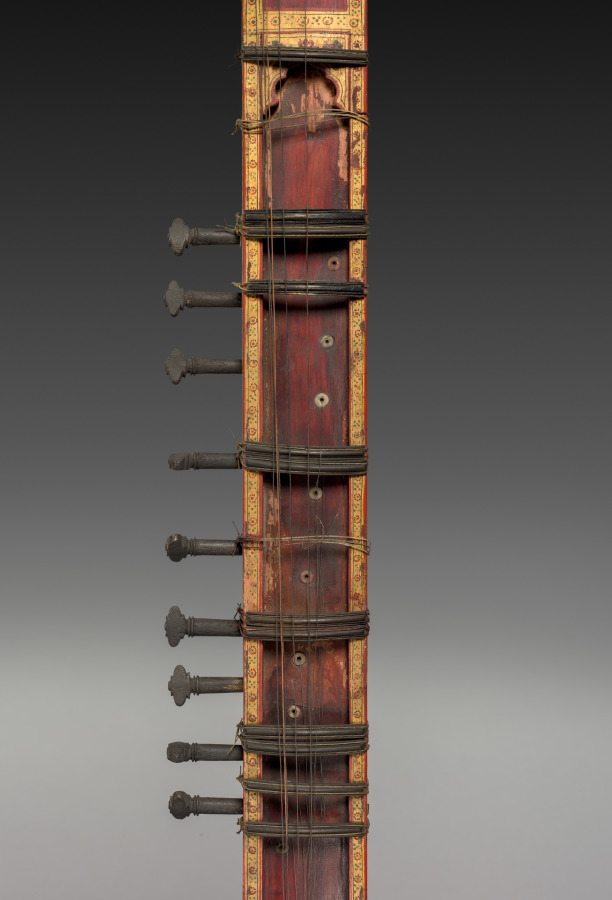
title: Sitar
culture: Eastern India, Bengal or Bangladesh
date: c. 1850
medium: Gourd and wood with pigment, ivory, and bone; copper alloy: frets; iron alloy: strings (with one modern copper replacement)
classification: Musical Instrument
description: The stringed instrument known as the sitar usually provided the central sound for the musical performances that were a constant feature of court life in India. The sitar could then be accompanied by percussion, voice, and other supporting instruments. In Raja Deen Dayal’s photograph Maharaja of Rewa in Prayer (2016.266.21), a musician strums a sitar in order to please the deities on the royal altar. The improvised compositions are played in a mode, or key, that correlates to the time of day and season of the year.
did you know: Many paintings of Indian court life depict female musicians holding and playing this kind of lightweight stringed instrument.